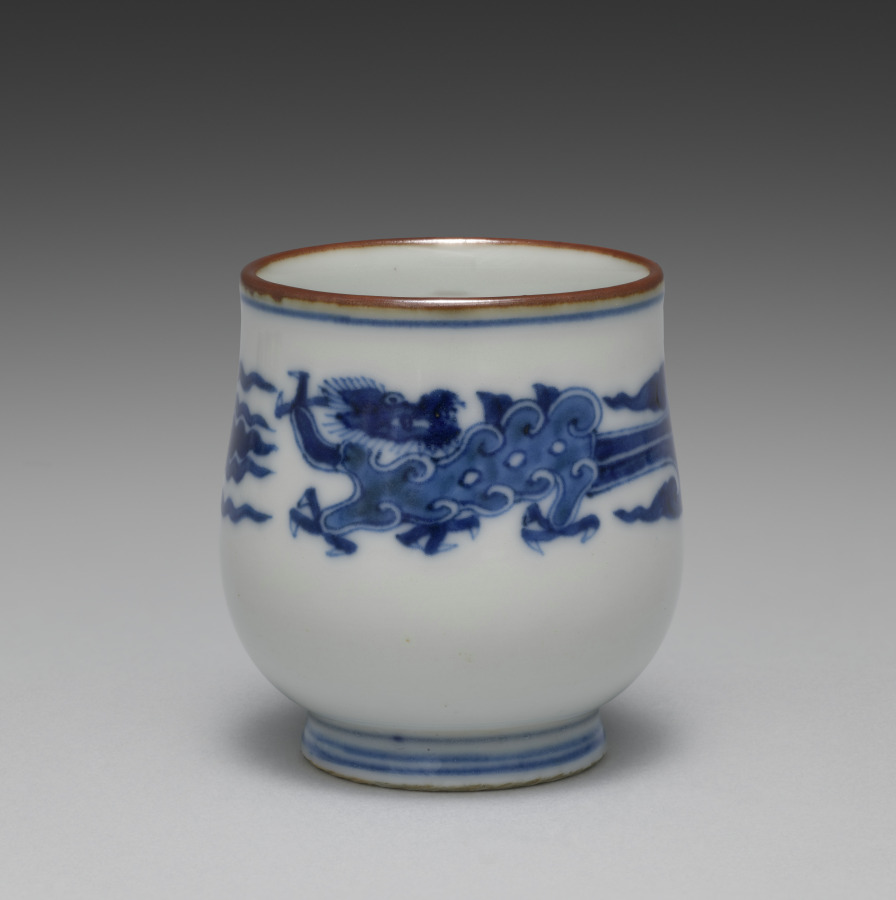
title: Cup from Sake Cups with Dragons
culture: Japan, Meiji period (1868–1912)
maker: Seifū Yohei III (Japanese, 1851–1914)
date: c. 1893–1914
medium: One from a set of six sake cups; porcelain with underglaze blue and iron oxide rims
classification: Ceramic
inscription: 大日本清風造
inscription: 清風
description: Each of these sake cups pictures two backward-looking dragons. The highly stylized creatures resemble jade carvings.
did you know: Seifū Yohei III was inspired by the Chinese mythical animals that were common on porcelain objects made at Jingdezhen in China during the Ming dynasty (1368–1644) and then exported around the world.